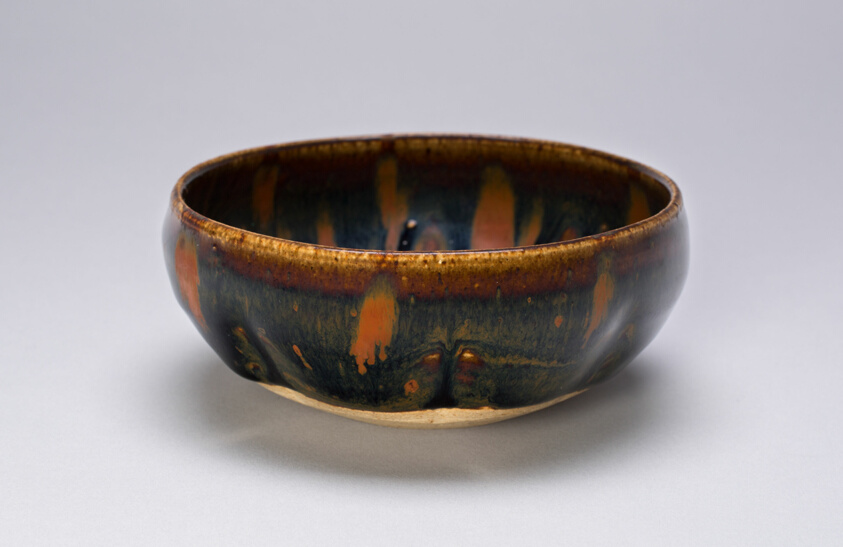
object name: Vessel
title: Shallow Lobed Bowl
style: Chinese (culture or style)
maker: China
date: Northern Song (960–1127) or Jin dynasty (1115–1234), c. 12th century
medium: Northern blackware, Cizhou type; stoneware with russet-streaked dark brown glaze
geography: China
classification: bowl; dish (vessel); ceramics; vessel